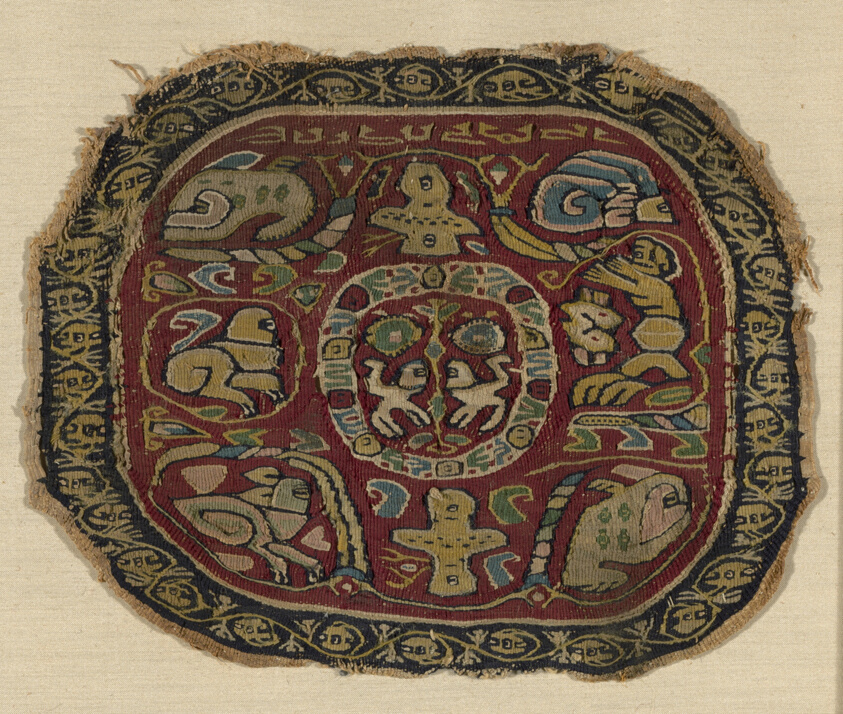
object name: Textile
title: Roundel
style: roman period (egyptian), byzantine, european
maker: Coptic (Egypt)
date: Roman period (30 B.C.– 641 A.D.)/Arab period (641–969), 7th century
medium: Wool and linen; slit tapestry weave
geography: Egypt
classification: textile; weaving